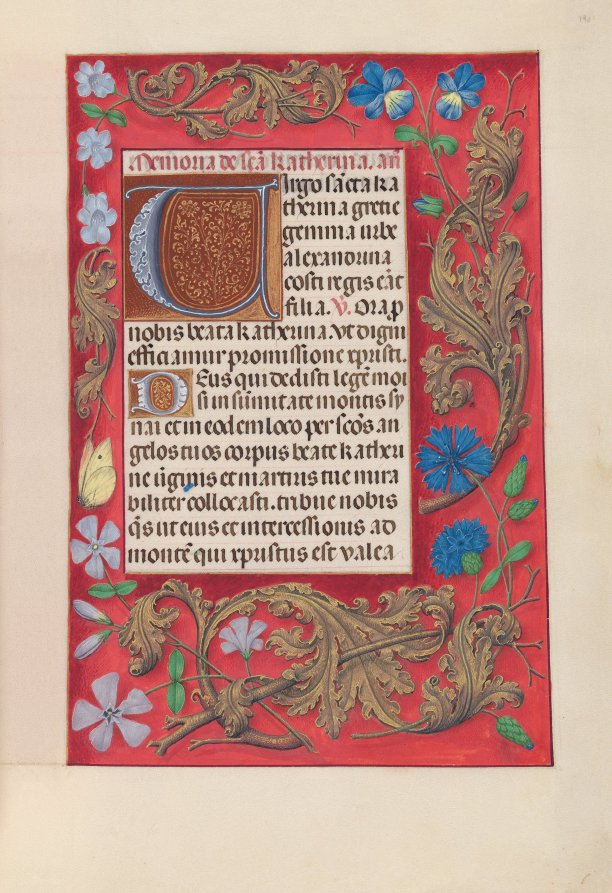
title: Hours of Queen Isabella the Catholic, Queen of Spain: Fol. 190r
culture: Flanders, Ghent and Bruges, late 15th century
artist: Master of the First Prayerbook of Maximillian (Flemish, c. 1444–1519)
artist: and Associates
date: c. 1500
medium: ink, tempera, and gold on vellum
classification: Bound Volume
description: This manuscript was illuminated by a circle of at least five highly organized manuscript painters active in the Flemish cities of Ghent and Bruges. The principal illuminator was Alexander Bening, who painted the majority of the book's miniatures. Manuscripts produced by this circle of artists are renowned for the decoration of their borders, which typically feature a rich variety of realistically-painted flowers, birds, and butterflies. This prayer book, called a book of hours, was intended not for a cleric, but for the private devotions of a lay person-in this case, Isabella the Catholic, Queen of Spain (1451-1504). Isabella's coat of arms embellishes the book's frontispiece. It is unlikely that the book was commissioned by the Queen herself; rather, she probably received it as a diplomatic gift from someone courting her patronage, perhaps Cardinal Francisco Jimenez de Cisneros. A Franciscan friar, Jimenez was dependent upon Isabella for his advancement, first to the post of Queen's confessor in 1492, and then to Archbishop of Toledo in 1495.